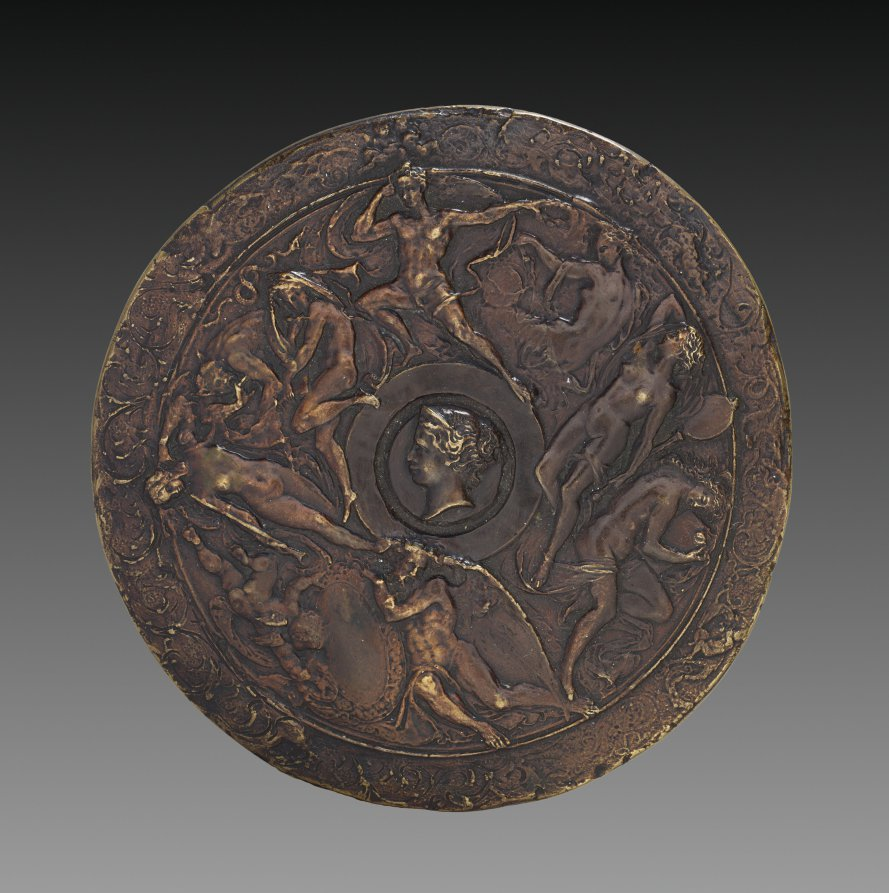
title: Circular Plaquette with Frieze of Mannerist Figures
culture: Italy, early 20th Century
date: c. 1900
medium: bronze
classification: Sculpture